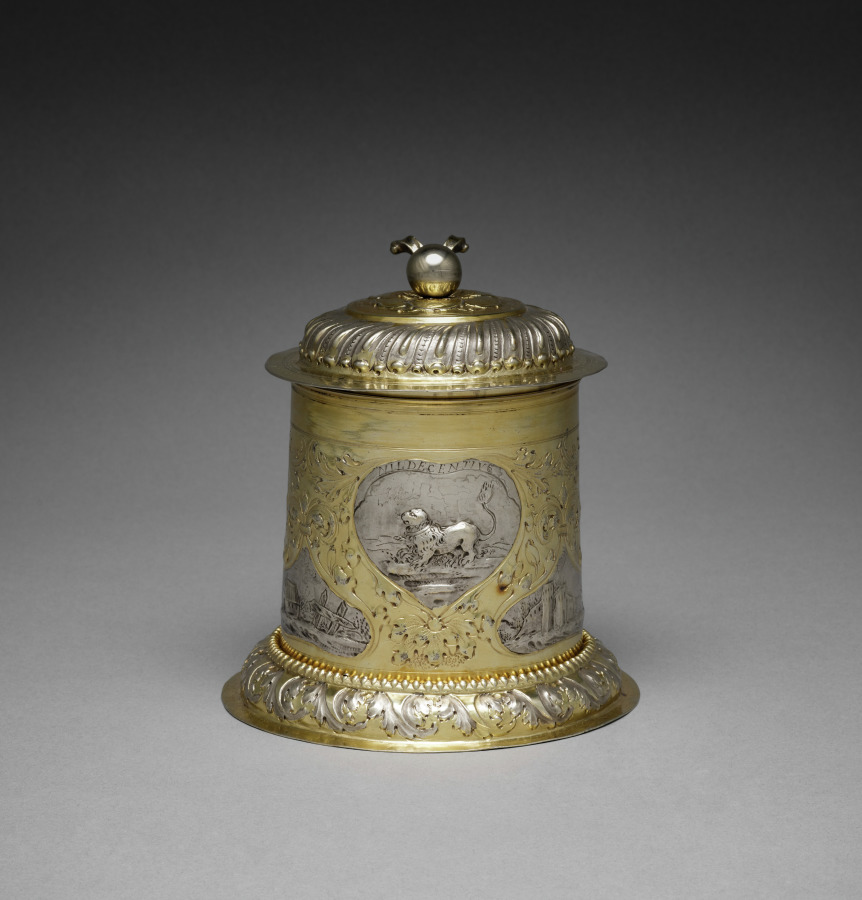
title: Tankard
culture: Germany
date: 1600s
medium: silver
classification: Silver